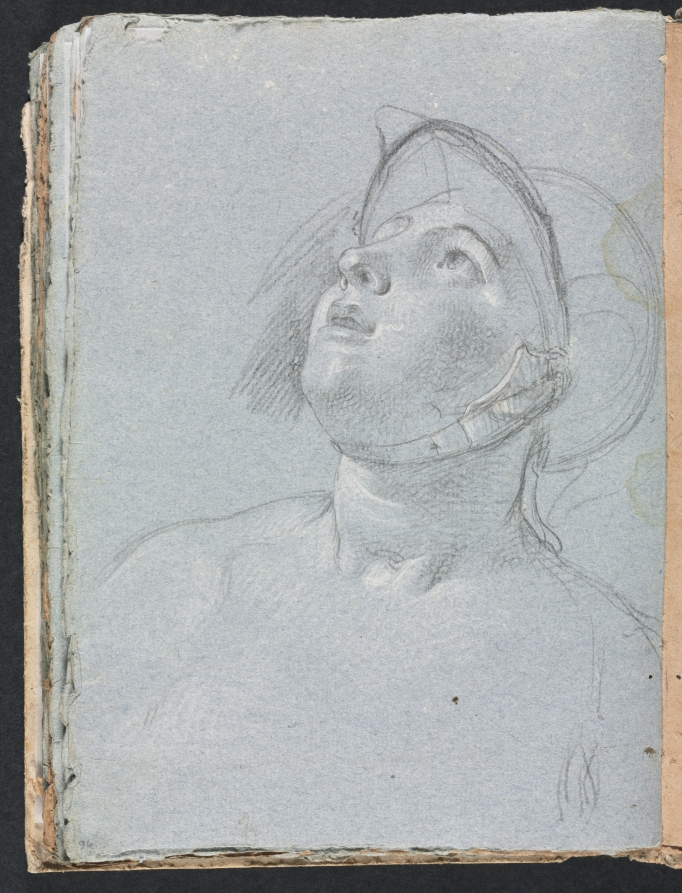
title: Verona Sketchbook: Soldier (page 96)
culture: Italy, 18th century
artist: Francesco Lorenzi (Italian, 1723–1787)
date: 1760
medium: black chalk with white heightening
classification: Bound Volume